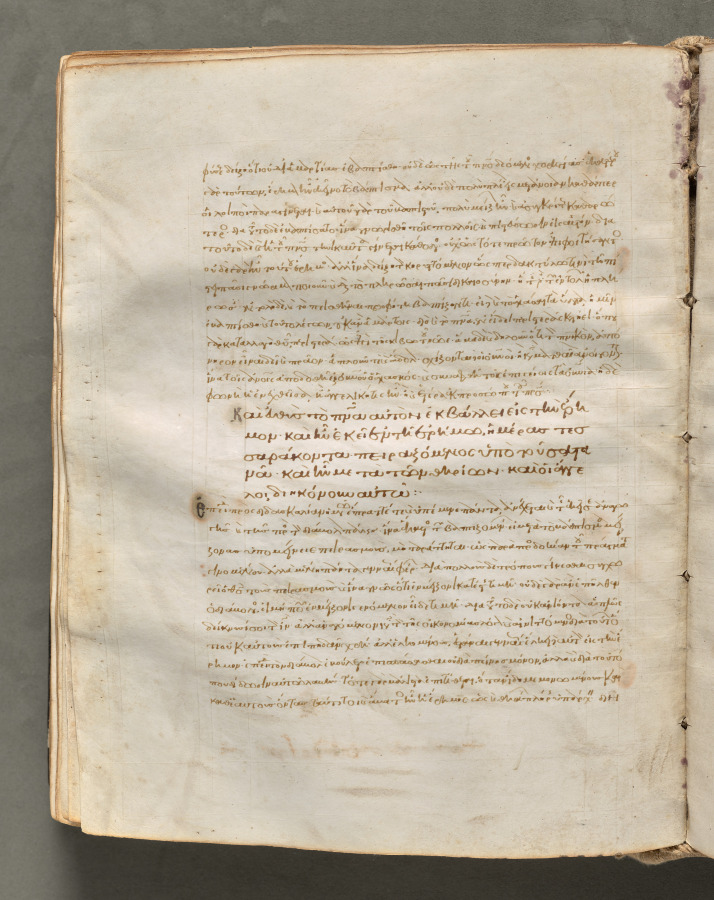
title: Text, folio 133 (verso), from a Gospel Book with Commentaries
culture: Byzantium, Constantinople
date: c. 1000–1100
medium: ink, tempera, and gold on vellum; leather binding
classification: Bound Volume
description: Each of the four gospels in this book opens on a page with brilliantly illuminated borders depicting the author of the text as well as birds-principally peacocks, symbols of the immortality of the soul-and fountains, representing the fountain of life and the salvation of the soul. This volume consists of 428 leaves with texts in Greek. Its level of sophistication suggests that it was probably written and decorated in a monastery in Constantinople.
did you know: Gospel Books were carried in procession through Byzantine churches.